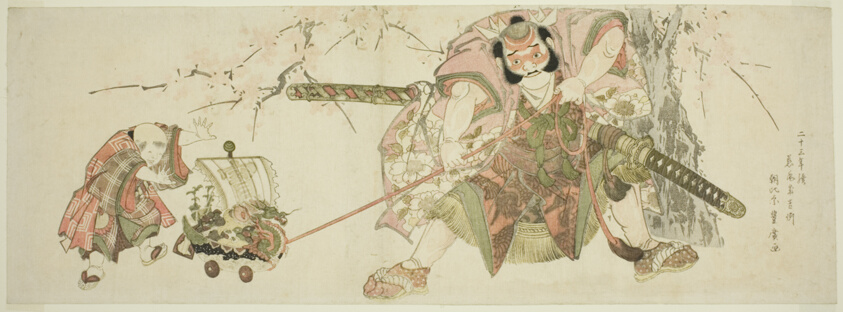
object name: Print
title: The Festive Custom of Asahina Continued by Jihinari for Twenty-three years (Nijusan-nen tsuzuki Jihinari kichirei Asahina)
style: Japanese (culture or style)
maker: Utagawa Toyohiro (Japanese, 1773-1828)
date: 1820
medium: Color woodblock print; horizontal nagaban, surimono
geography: Japan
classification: woodblock print; print; asian art